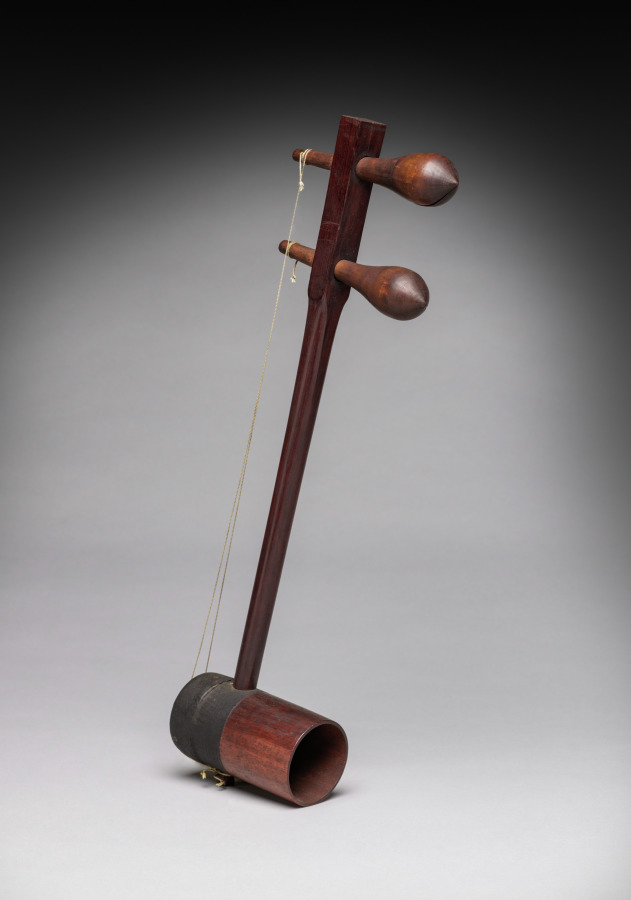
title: Erxian (Two-Stringed Chinese Fiddle)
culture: China, Qing dynasty (1644-1911)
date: 1800s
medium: wood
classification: Musical Instrument